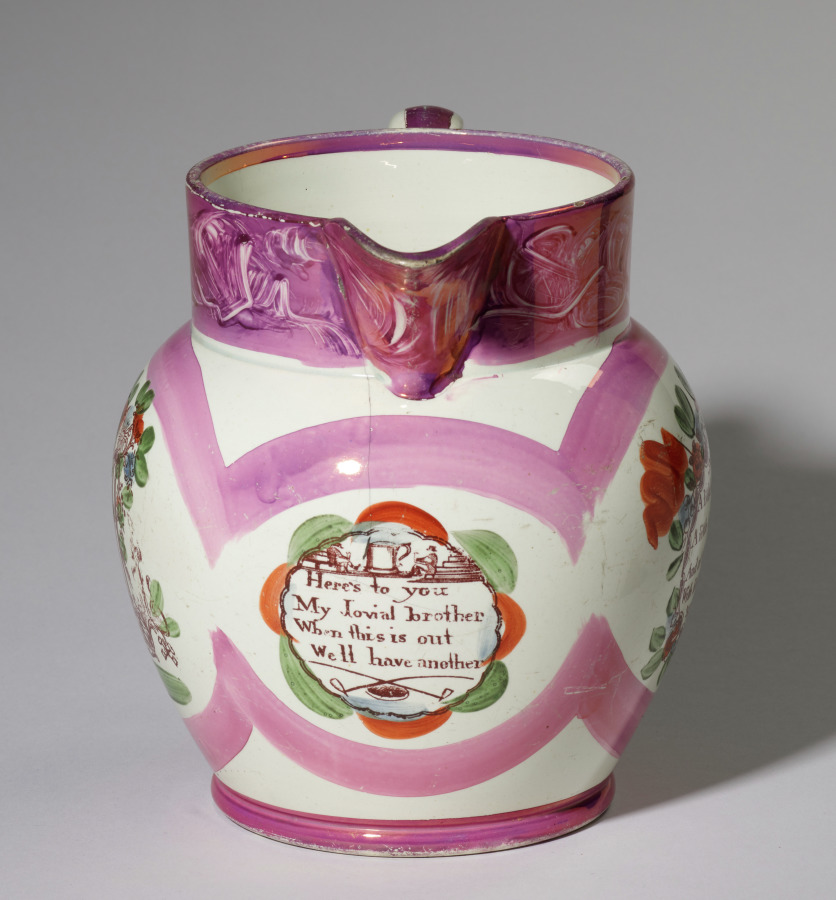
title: Masonic Pitcher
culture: England, Staffordshire, late 18th-early 19th Century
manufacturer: Staffordshire Factory (British)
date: c. 1800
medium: pottery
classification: Ceramic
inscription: on front: "MASON'S ARMS"; on one side: "A little health a little wealth, a little house with freedom, And at the end a little friend With little cause to need him"; on other side: "Here's to you My Jovial brother, When this is out We'll have another."